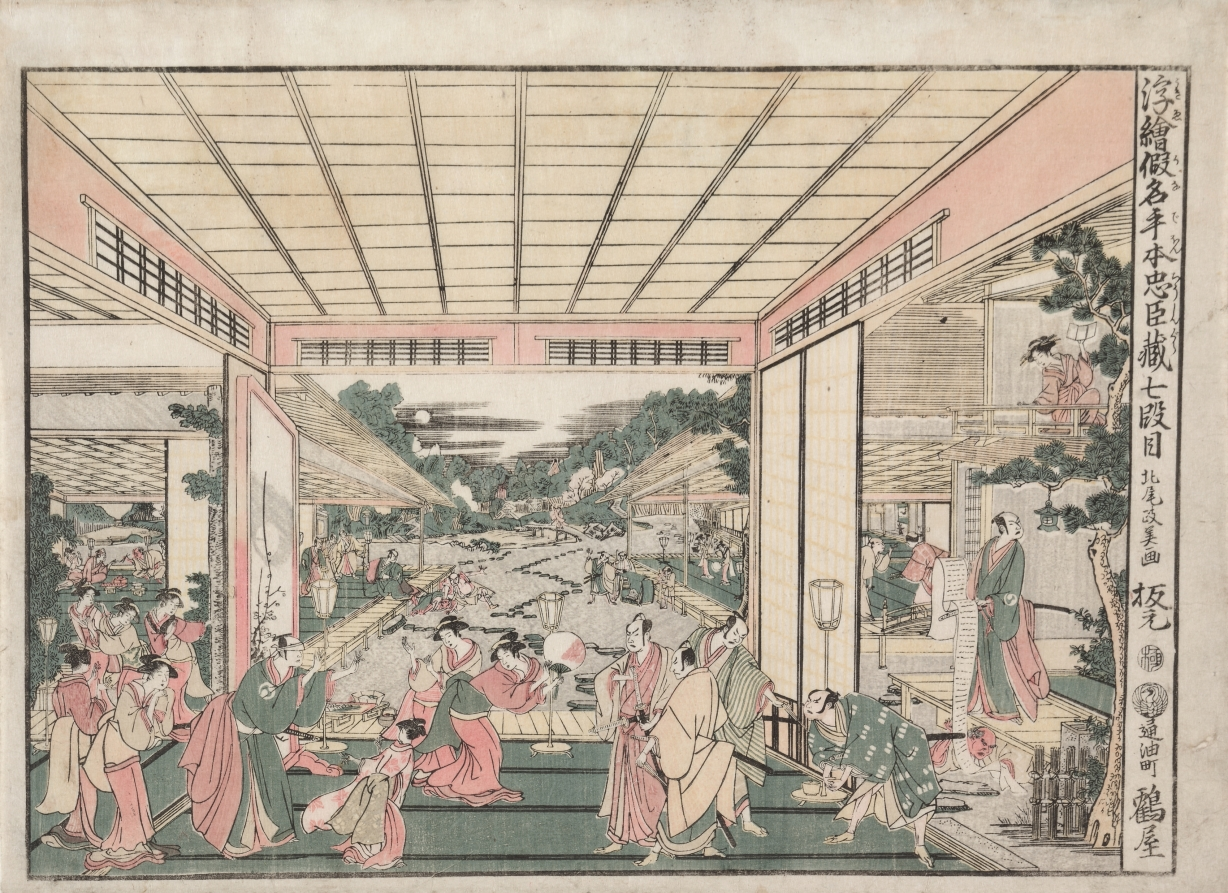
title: Chushingura: Act VII (from the series Perspective Pictures for The Treasure House of Loyalty)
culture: Japan, Edo period (1615–1868)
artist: Kitao Masayoshi (Japanese, 1761–1824)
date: c. 1790s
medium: color woodblock print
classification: Print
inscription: Signature: Kitao Masayoshi ga Publisher: Tsuruya Kiemon (hammoto Toriaburacho Tsuruya, emblem) Censorship Seal: kiwame